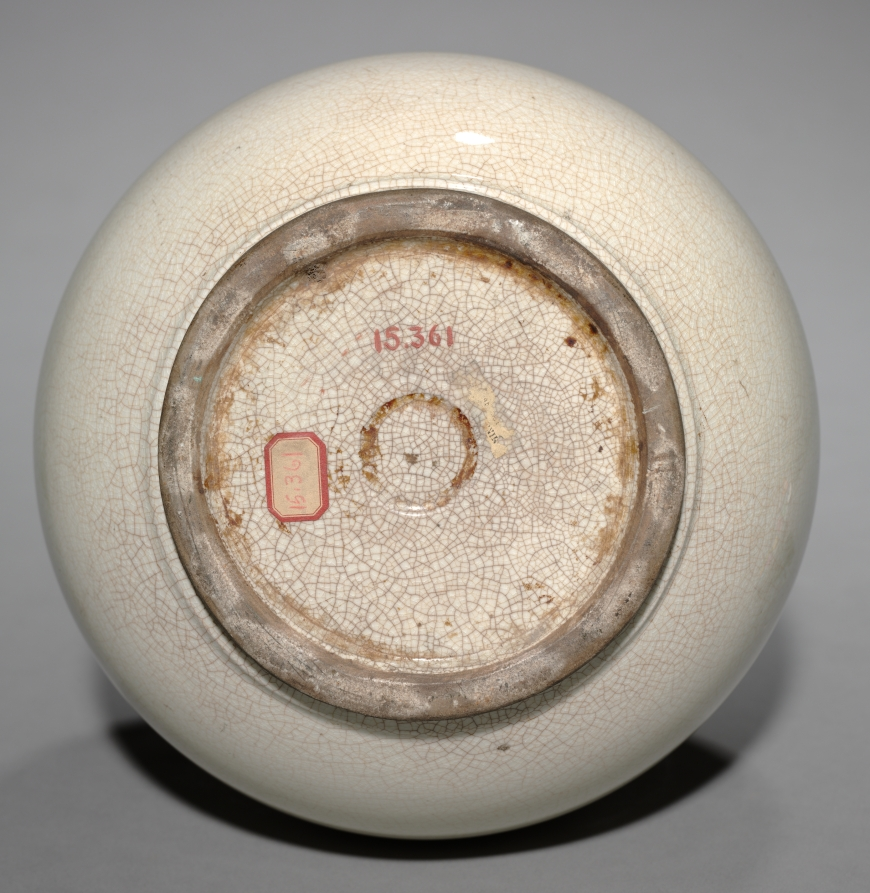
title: Double Gourd-shaped Bottle: Ding ware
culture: China, Ming dynasty (1368–1644)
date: 1368–1644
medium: porcelain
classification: Ceramic